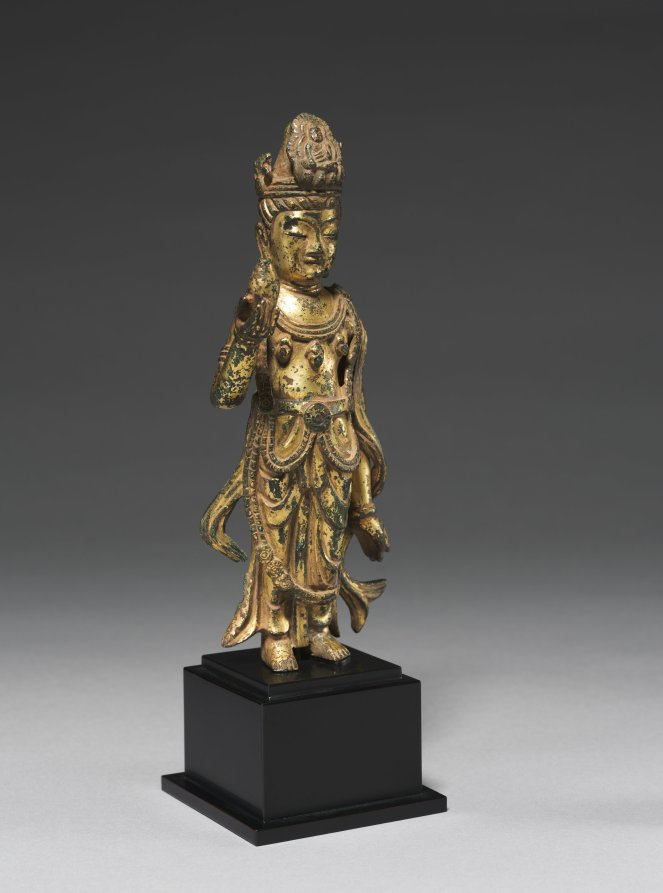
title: Standing Avalokitesvara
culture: Korea, Unified Silla period (668-935)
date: 700s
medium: Gilt-bronze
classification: Sculpture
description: This small gilt-bronze statue represents the Bodhisattva of Compassion (관음보살 in Korean), an enlightened being who helps devotees on their path. It features two prominent attributes: a water sprinkler (kundika in Sanskrit) and a miniature image of Buddha Amitābha in its jeweled crown. Its sweet and gentle smile accentuates this celestial being’s immeasurable compassion for human suffering.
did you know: Created during the Unified Silla period, a high point of the spread of Buddhist teachings, this kind of miniature gilt-bronze statue was often used as a portable object of devotion by traveling Buddhist monks.